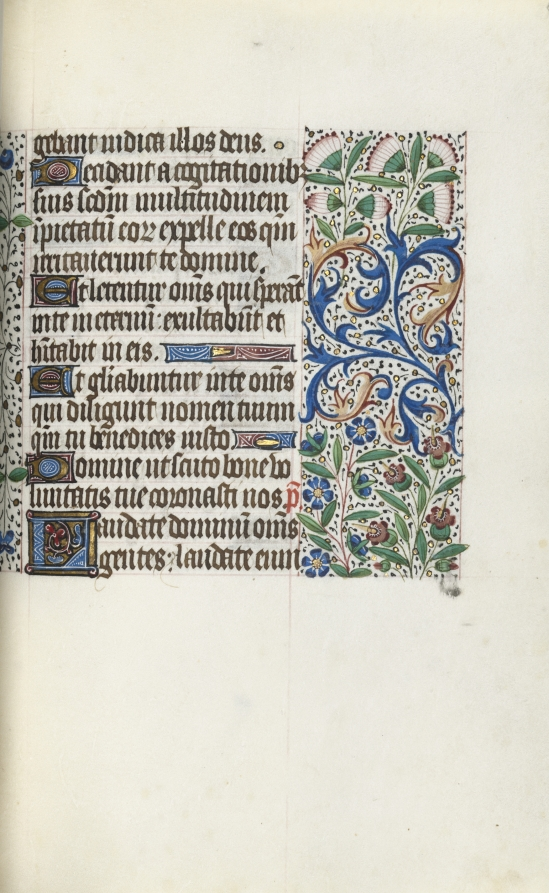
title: Book of Hours (Use of Rouen): fol. 60r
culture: France, Rouen, 15th century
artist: Master of the Geneva Latini (French, active Rouen, 1460–80)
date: c. 1470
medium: ink, tempera, and gold on vellum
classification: Bound Volume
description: In the late 1400s and early 1500s Rouen was an established and important center of book production. The city’s cathedral had a wealthy chapter that spent large sums of money to commission books and to maintain its extensive library. The stationers and booksellers would have likely been concentrated in or near the cathedral precinct. This artist, named after a manuscript now in Geneva, was Rouen’s principal illuminator during the second half of the 1400s.